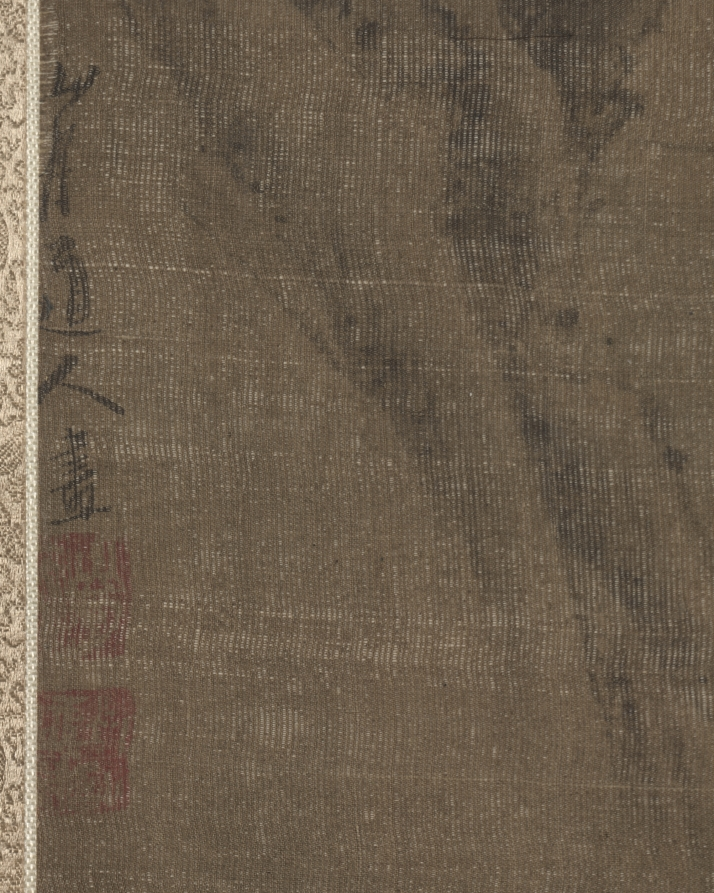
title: Liu Haichan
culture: China, Yuan dynasty (1271-1368)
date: 1300s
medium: Hanging scroll; ink and color on silk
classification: Painting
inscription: Inscribed in upper right corner: The old tree has its green shrouded in mist/ In the depth of the mountain the moon is bright/ By no means could the eyes of the dusty world/ Understand these particular feelings. Shan-yüeh tao-jen [seal] Shan-yüeh (?)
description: Liu Haichan is a Daoist immortal sometimes included in the Eight Immortals. He is often shown as a young man wearing bangs across his forehead. He was said to have lived during the Five Dynasties period (907–979) and left his position as a grand councilor to become a hermit. Usually depicted carrying a string of coins and accompanied by a three-legged toad, Liu Haichan became a god of wealth and his toad symbolizes wealth as well. In this scroll, Liu is teasing the three-legged toad with a string of coins tied to his waist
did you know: Because the immortal Liu Haichan is usually depicted with bangs, his eponym, liúhǎi 劉海, means "bangs" in Chinese.